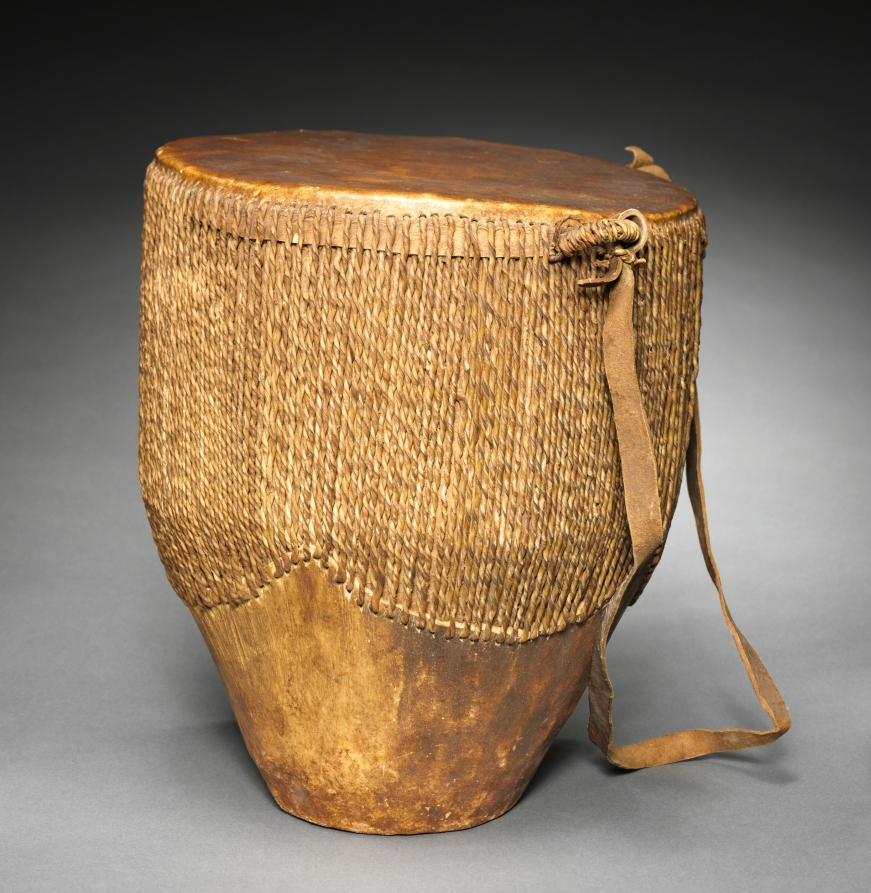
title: Drum (ngoma)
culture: Africa, Eastern Africa, unknown maker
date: by 1928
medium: Wood, rawhide, and plant fiber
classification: Musical Instrument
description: This musical instrument takes its name ngoma from the Kongo language word for "drum." Specialized craftspeople often made these drums. The wooden base is hollow and covered with a first hide, then a second one held tight by plant fibers. This allows the sound to resonate when just the first membrane is struck. In Uganda, drums contain a ritual "heart" known only to its maker, which helps to imbue it with power. In contrast with royal drums (mpango), this instrument is not considered sacred. The sounds from men striking drums could be used as a kind of communication or as music in a performance setting.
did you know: Paul Travis purchased this piece in Kampala, Uganda, shortly after receiving a telegram informing him that the African Art Sponsors and the Gilpin Players had commissioned him to collect African works with money they raised.